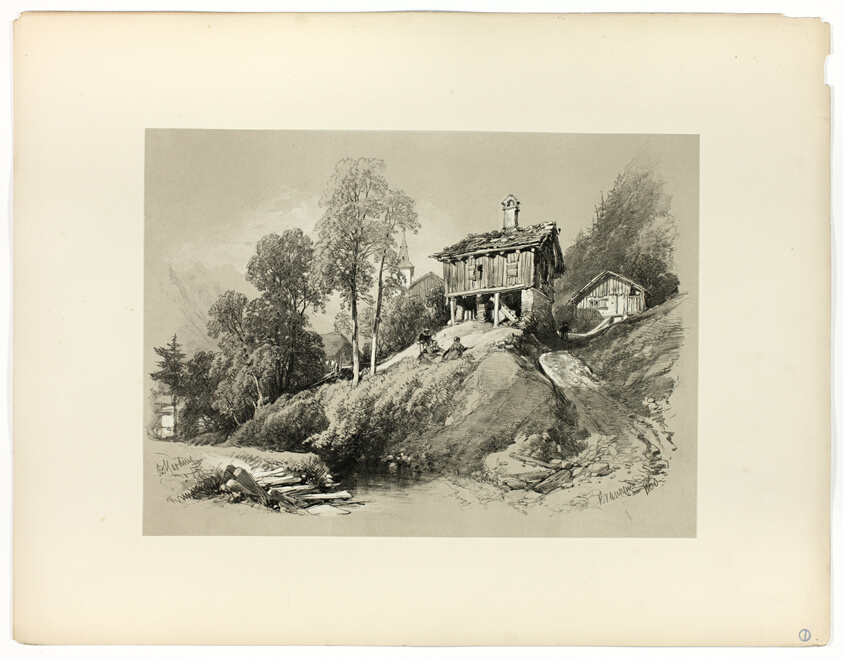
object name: Print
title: Brunnen, from Picturesque Selections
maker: James Duffield Harding, (English, 1798-1863); Published by W. Kent and Co.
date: 1860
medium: Lithograph on paper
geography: England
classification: lithograph; print; prints and drawing